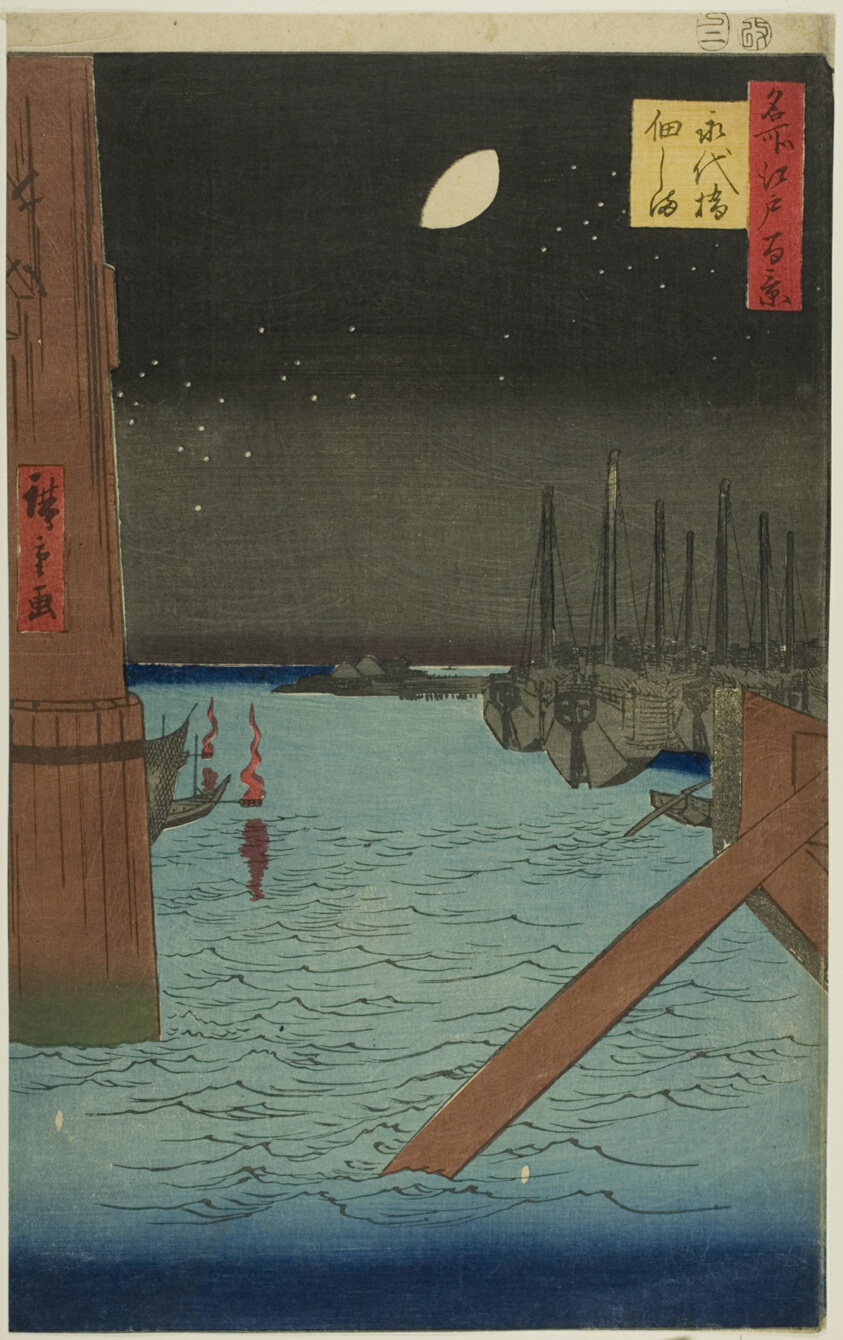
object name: Print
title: View of Tsukuda Island from Eitai Bridge (Eitaibashi Tsukudajima), from the series "One Hundred Famous Views of Edo (Meisho Edo hyakkei)"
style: Japanese (culture or style)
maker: Utagawa Hiroshige 歌川 広重; Japanese, 1797–1858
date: 1857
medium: Color woodblock print; oban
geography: Japan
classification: woodblock print; print